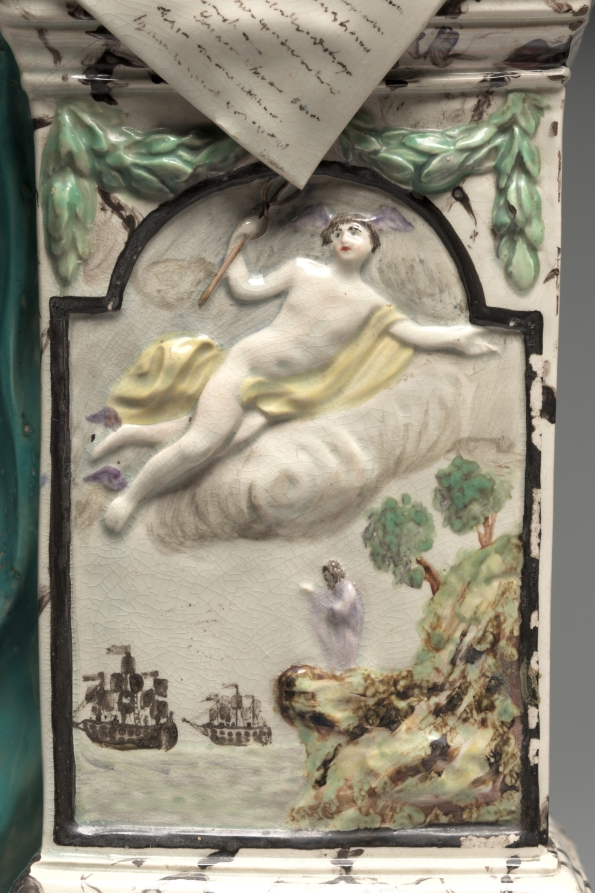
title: Figure of Demosthenes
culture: England, Staffordshire, Burslem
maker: Enoch Wood (British, 1759–1840)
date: c. 1800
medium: lead glazed earthenware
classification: Ceramic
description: Ceramic figures often depicted literary or mythological characters as a means of representing knowledge and intellectual refinement. As a result, they became an integral part of the decoration of most middle-class or wealthy houses in the 1700s and early 1800s. This figure depicts the Athenian orator Demosthenes (384–322 BC) delivering one of his philosophical lectures. The adjacent plinth reinforces his identity with a small image of a man lecturing the sea, something Demosthenes was known to do, while Hermes, the Greek god of eloquence, hovers above.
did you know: In Victorian times, this figure was thought to depict St. Paul preaching in Athens, but it actually portrays the Greek orator Demosthenes delivering one of his philosophical lectures.